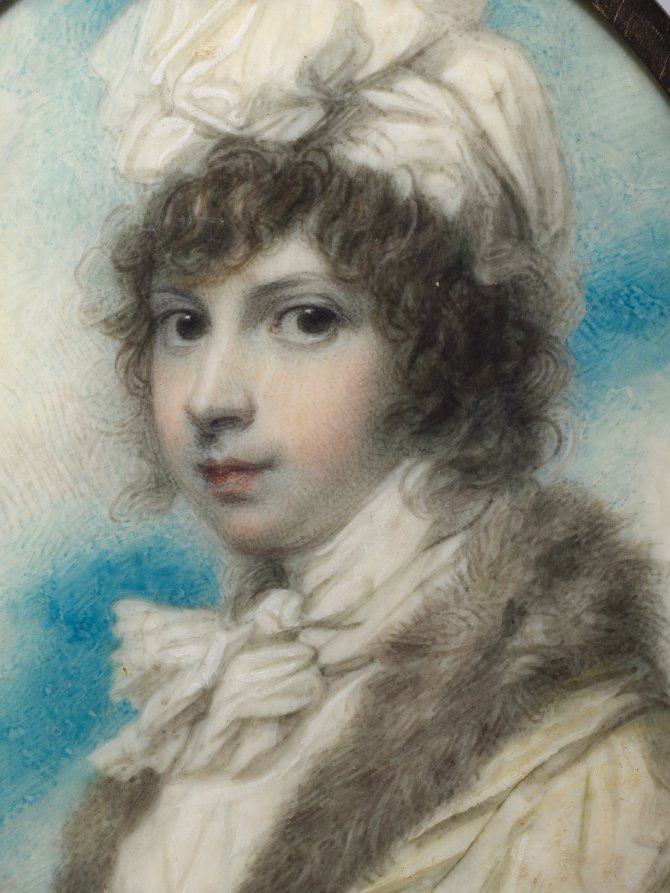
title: Portrait of the Hon. Anne Annesley, later Countess of Mountnorris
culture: England, 19th century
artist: Richard Cosway (British, 1742–1821)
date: c. 1800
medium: watercolor on ivory in a gold frame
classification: Portrait Miniature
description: Anne Annesley (née Courtenay, 1774–1835) was the eighth daughter of William 2nd Viscount Courtenay, and sister of William 3rd Viscount Courtenay, who commissioned numerous paintings of himself and his six sisters from Richard Cosway in oil and miniature. William’s expenditure for these works between 1790 and 1812 reached £1,370, a bill that wasn’t paid in full until 1820. Anne married George Annesley, later 2nd Earl of Mountnorris, in September 1790. Cosway, who frequently depicted female sitters in gauzy white gowns, lavished attention on Anne’s attire. Her pale yellow coat is lined with fur that is sensitively delineated with a combination of short brushstrokes distinct from those that form her dark, wavy hair. Fur-trimmed jackets like this one would probably have been worn indoors by women during the colder months.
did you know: Another version of this portrait is nearly identical to the Cleveland miniature and was likely for another friend or member of Anne's family.